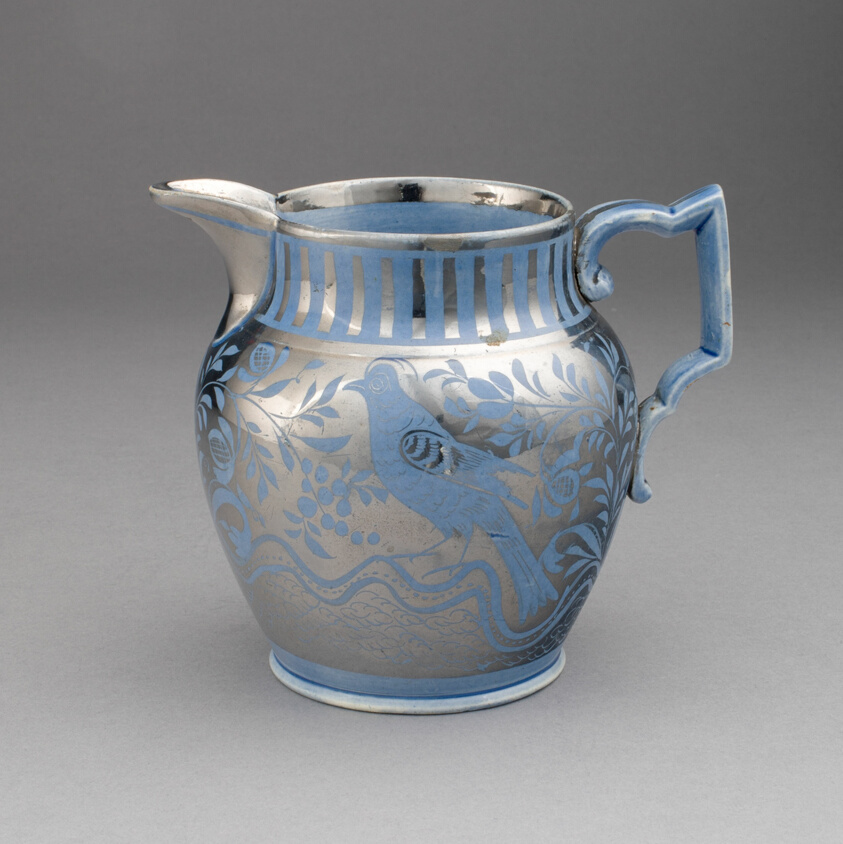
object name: Ceramics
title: Pitcher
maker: England, Leeds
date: 1810/20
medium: Lead-glazed earthenware with lustre decoration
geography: Leeds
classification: pitcher (vessel); earthenware; vessel; european decorative arts; ceramics